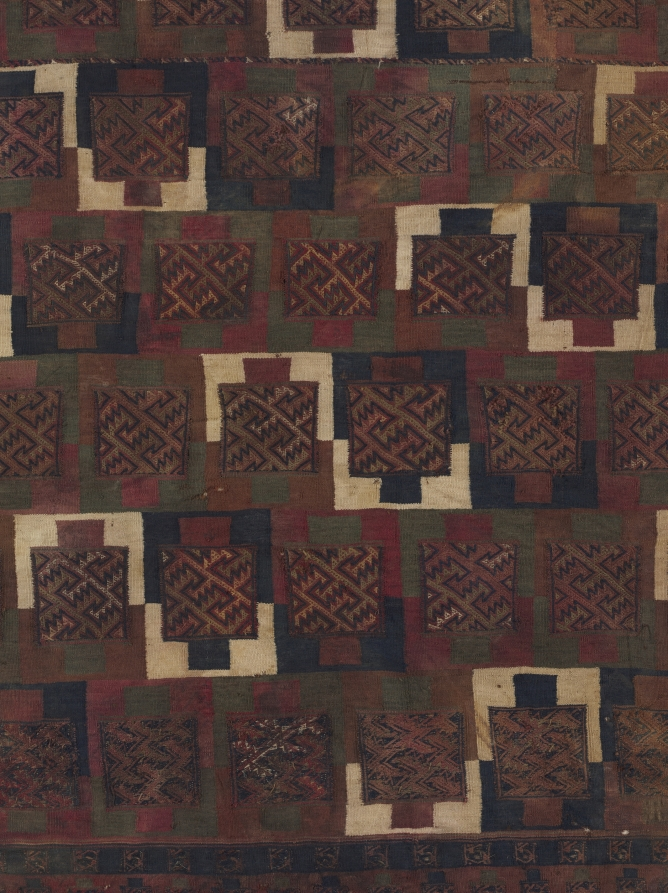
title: Dress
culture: Peru, South Highlands or South Coast, Chuquibamba style, 12th-16th century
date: c. 1100–1532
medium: camelid fiber; tapestry and complementary-weft weave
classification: Textile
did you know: This wrap-around textile is meant for a female; the upper border folds over the bodice.